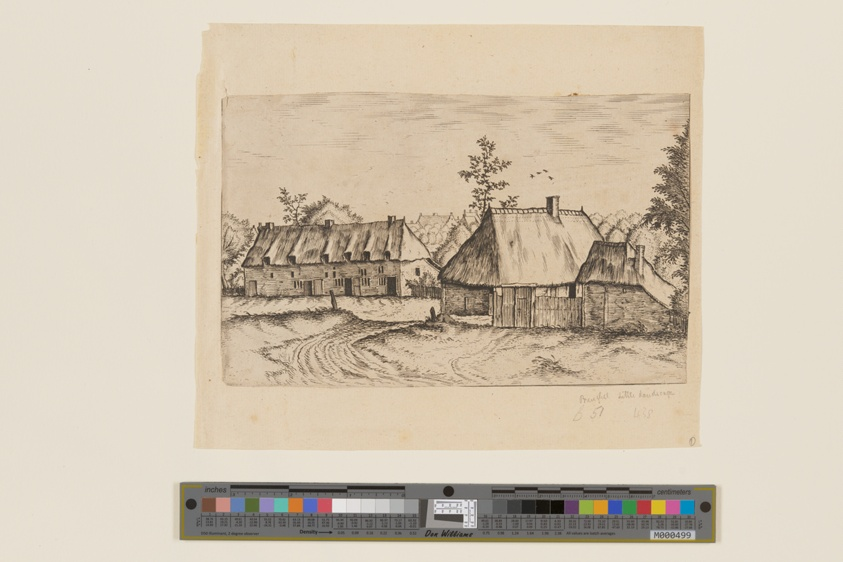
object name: Print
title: Road Leading to a Stable and a Barn, from Master of the Small Landscape Series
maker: Johannes van Doetecum (Netherlandish, 1528/32–1605) and Lucas Doetecum (Dutch, died before 1584); after the Master of the Small Landscapes (Flemish, active 1555-1600)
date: c. 1560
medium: Engraving on ivory laid paper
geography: Netherlands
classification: engraving; paper; print; prints and drawing